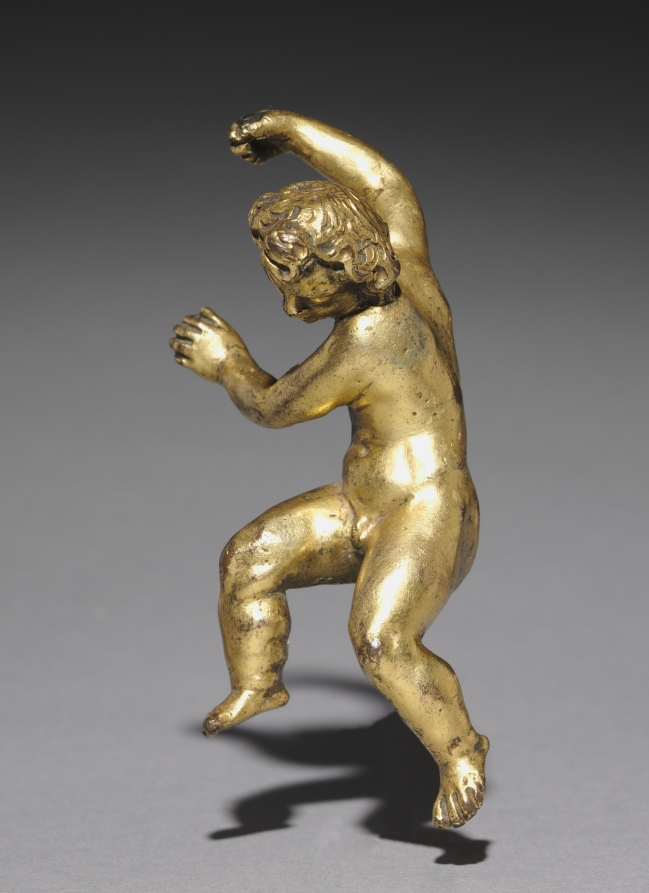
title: Putto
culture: Italy, Rome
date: late 1500s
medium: gilt bronze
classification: Sculpture